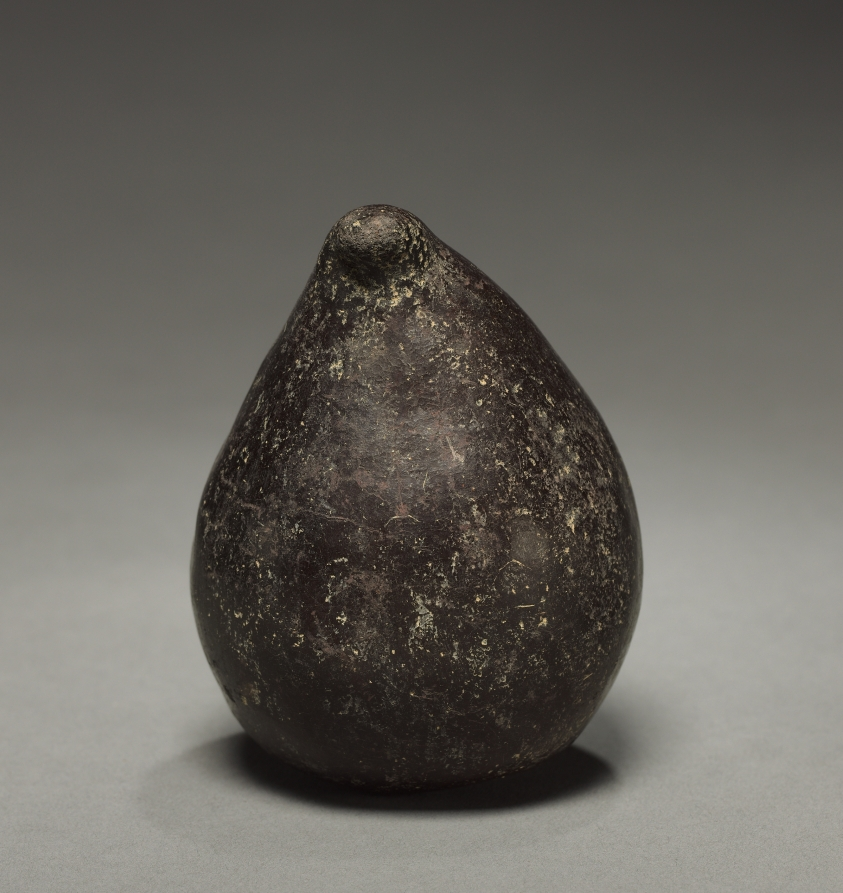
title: Fruit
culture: Colombia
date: before 1921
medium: pottery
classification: Ceramic